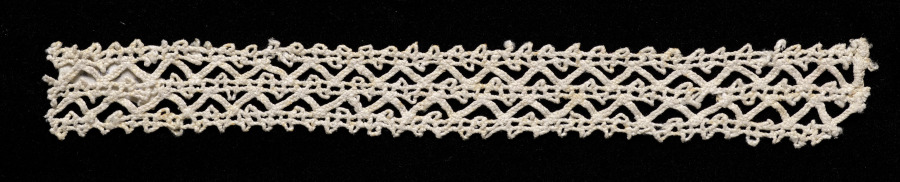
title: Lace Insertion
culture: Italy, Venice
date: 1540–60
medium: Bobbin lace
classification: Lace